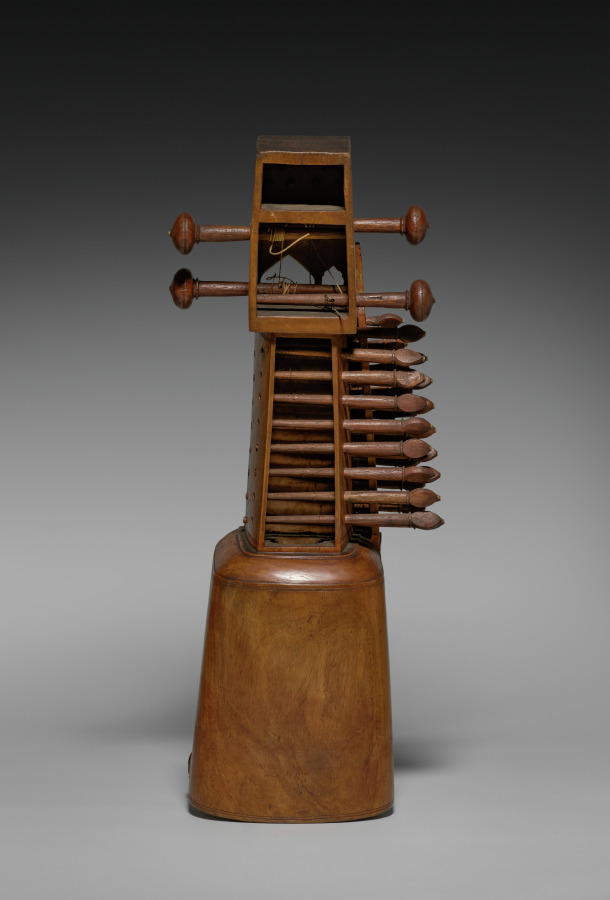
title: Sarangi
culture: India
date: 1800s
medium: Wood, parchment, bone or ivory, wood inlays, gut, and copper strings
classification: Musical Instrument